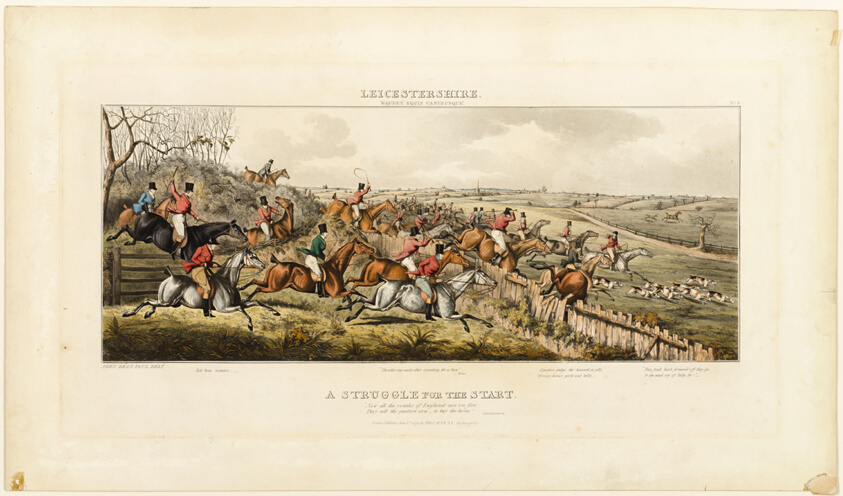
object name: Print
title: A Struggle for the Start, plate one from The Leicestershire Hunt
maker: John Dean Paul (English, 1775-1852); Thomas McLean (English, 1788-1875)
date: published 1825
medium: Hand-colored aquatint on ivory wove paper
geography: England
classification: aquatint; print; prints and drawing